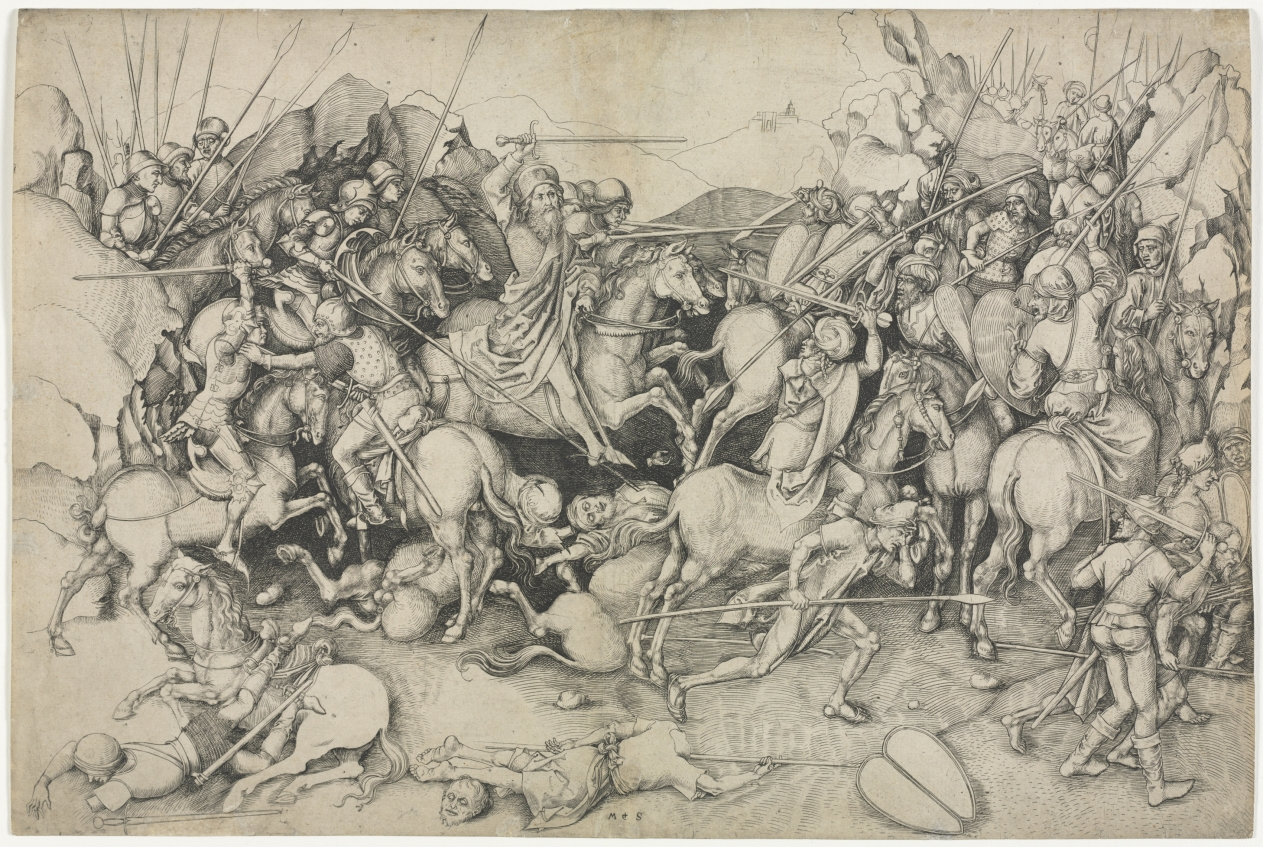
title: The Battle of St. James the Greater at Clavijo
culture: Germany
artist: attributed to Martin Schongauer (German, c. 1450–1491)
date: 1470–75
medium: engraving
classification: Print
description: According to legend, in 846 A.D. during a battle in Clavijo, one of the Christ's apostles and the patron saint of Spain, Saint James the Greater, miraculously appeared on the battlefield and helped the Christian armies of the Spanish king Ramirez defeat Muslim forces. Martin Schongauer portrays the climax of the battle, as Saint James appears on his steed at the center of the scene amidst gruesome beheaded corpses and dismembered limbs. The saint is brandishing a sword and wearing a scallop shell on his hat--an emblem adopted and worn by pilgrims during their travels to James's burial place, the Spanish Cathedral of Santiago de Compostela.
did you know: In this unfinished plate, the shield in the right foreground, the fallen horse at the bottom left, the points on the lances of the soldier in the upper left corner, and the hilly landscape are all details left uncompleted.